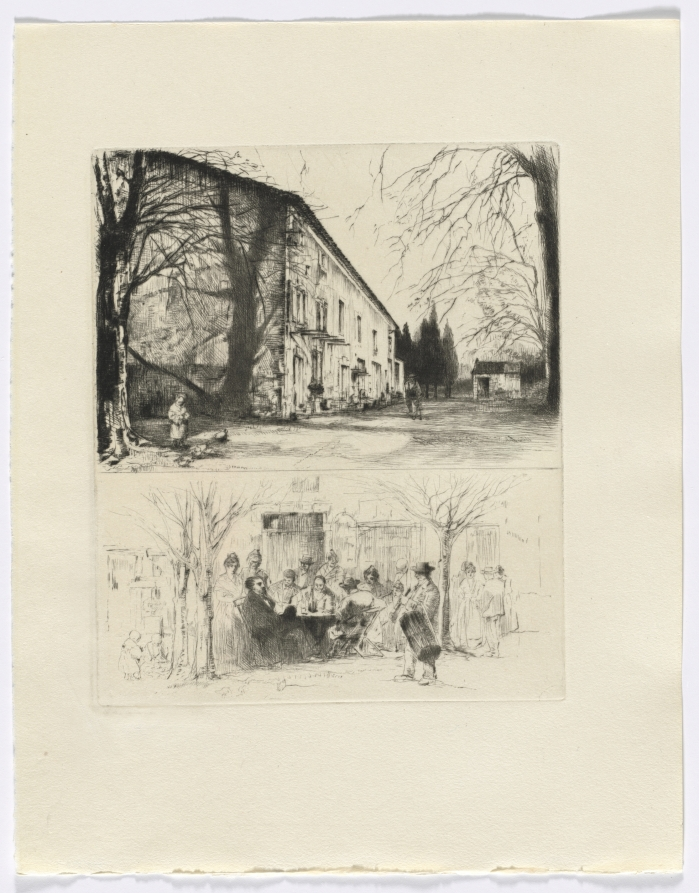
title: Frédéric Mistral: Mémoires et Recits by Frédéric Mistral: street scene/ people at outdoor table (insert after p. 24) DUPLICATE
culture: France, 20th century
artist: Auguste Brouet (French, 1872–1941)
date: 1937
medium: etchings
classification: Portfolio